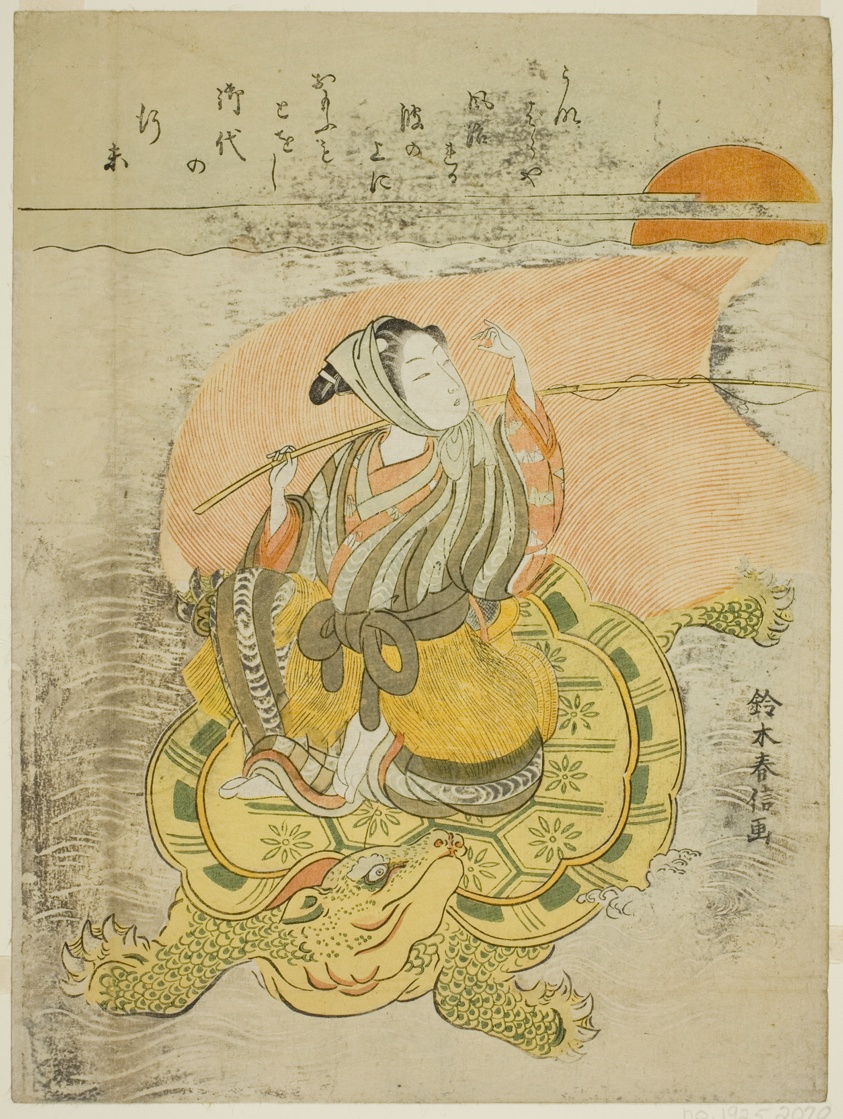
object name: Print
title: Young Man Riding a Giant Tortoise (parody of Urashima Taro)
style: Japanese (culture or style)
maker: Suzuki Harunobu 鈴木 春信; Japanese, 1725 (?)-1770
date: c. 1767/68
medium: Color woodblock print; chuban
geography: Japan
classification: woodblock print; print; asian art